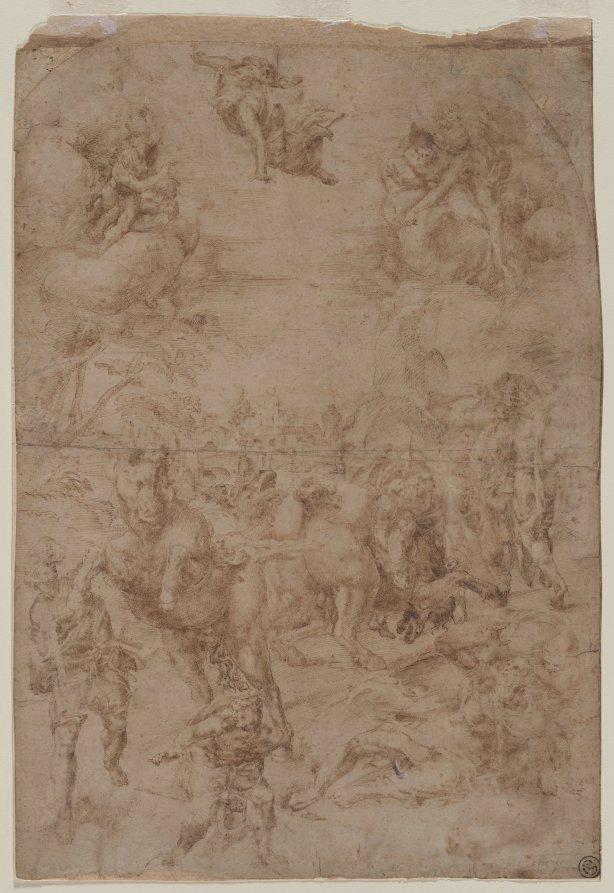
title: The Conversion of St. Paul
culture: Italy, 16th century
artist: Lelio Orsi (Italian, 1511–1587)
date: after 1575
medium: pen and brown ink and brush and brown wash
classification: Drawing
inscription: lower right, in brown ink: Michelangelo / Bonarota f.